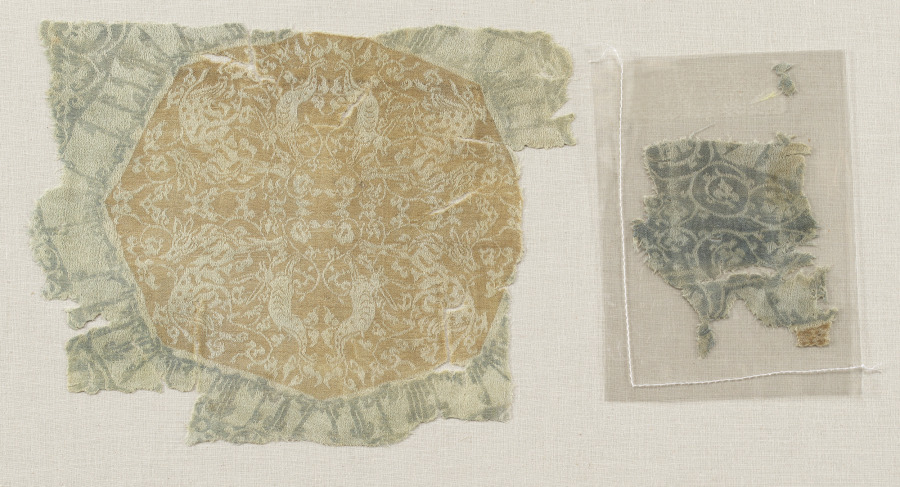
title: Fragment with Octagons and Four-Pointed Stars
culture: Iran or Iraq, in the style of the Seljuq period (1037–1194)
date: before 1949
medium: Silk: lampas weave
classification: Textile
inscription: inni la-'a'lamu wal-layl janan anna al-jannah fi arja' difafihi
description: The design consists of aligned large-scale octagons and four-pointed star-shaped interspaces filled with leafy scrolls. Each octagon encloses pairs of regardant gazelles and non-regardant rabbits in mirror image against a foliate background, patterned in white on a light pinkish-tan ground. Framing the octagon is a Kufic inscription repeated in orthograde and retrograde around the central design.